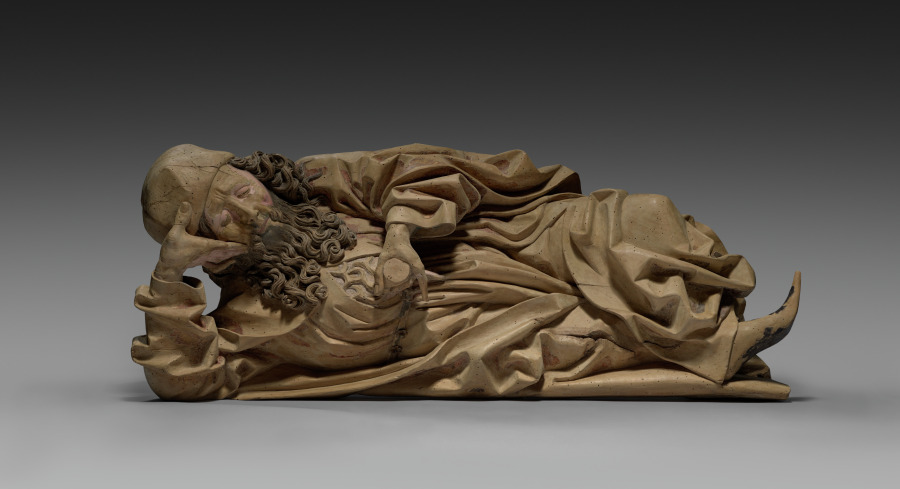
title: Jesse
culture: Germany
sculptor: Veit Stoss (German, c. 1445–1533)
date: c. 1500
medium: Limewood, polychromed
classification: Sculpture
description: The figure shows the sleeping Jesse, the father of David from the Old Testament. As the ancestor of the family tree of Christ, he was depicted in the Middle Ages sleeping as the starting point of the tree, on whose branches the ancestors of Christ are depicted. Mary with the Christ child is always shown at the top. The figure comes from a wooden altarpiece from an unknown church, possibly in Nuremberg, which is now lost. Veit Stoss is one of the most prominent German sculptors around 1500 who was mainly active in Nuremberg (Bavaria, Germany) and Krakow (Poland), also as a painter and engraver.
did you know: The family tree of Christ starts from Jesse, the father of David in the Old Testament.